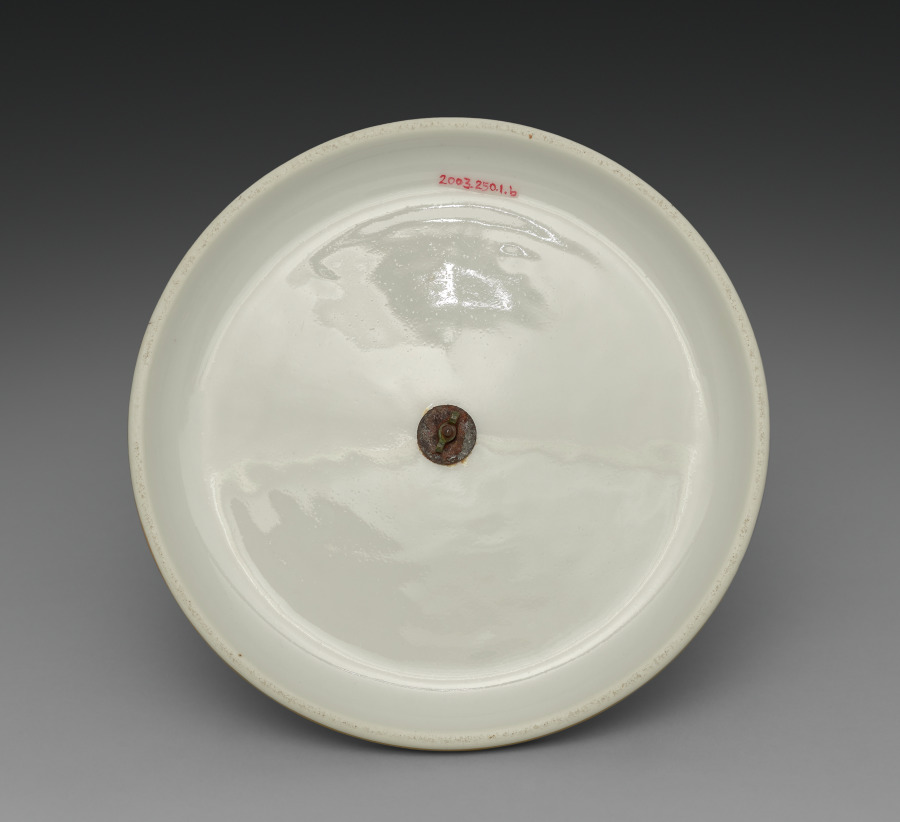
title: Lid for an Ice Cream Pail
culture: France, Paris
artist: Factory of Jacob-Petit (French, 1830–1865)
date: c. 1840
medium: gilt porcelain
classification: Ceramic